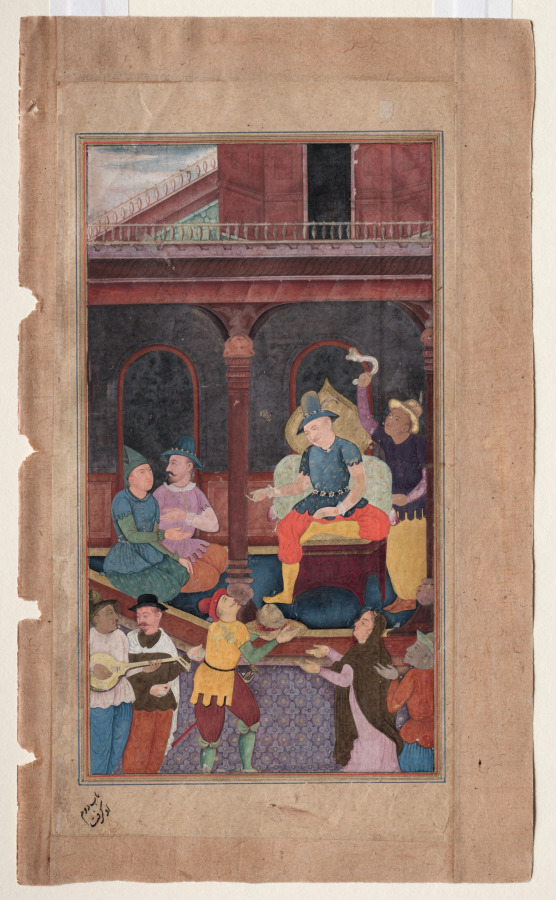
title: Salome Receiving John the Baptist’s Head on a Platter (folio 112 verso), from a Mirror of Holiness (Mir’at al-quds) of Father Jerome Xavier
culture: Mughal India, Allahabad, made for Prince Salim (1569–1627)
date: 1602–4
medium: Gum tempera, ink, color, and gold on paper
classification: Manuscript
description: Herod, King of Judea, sits on a Mughal-style throne as his wife’s daughter Salome reaches for the freshly severed head of John the Baptist. John had offended Herod’s wife, so she took revenge by having her daughter seduce Herod into granting her this wish. Salome is depicted modestly in this painting, and the court musician at the lower left looks on in disgust. The lion head capitals on the pillars above Herod are upside down, seemingly in disapproval of the debauched king.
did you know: Column capitals in Herod’s palace have angels seated on upside-down lion heads.